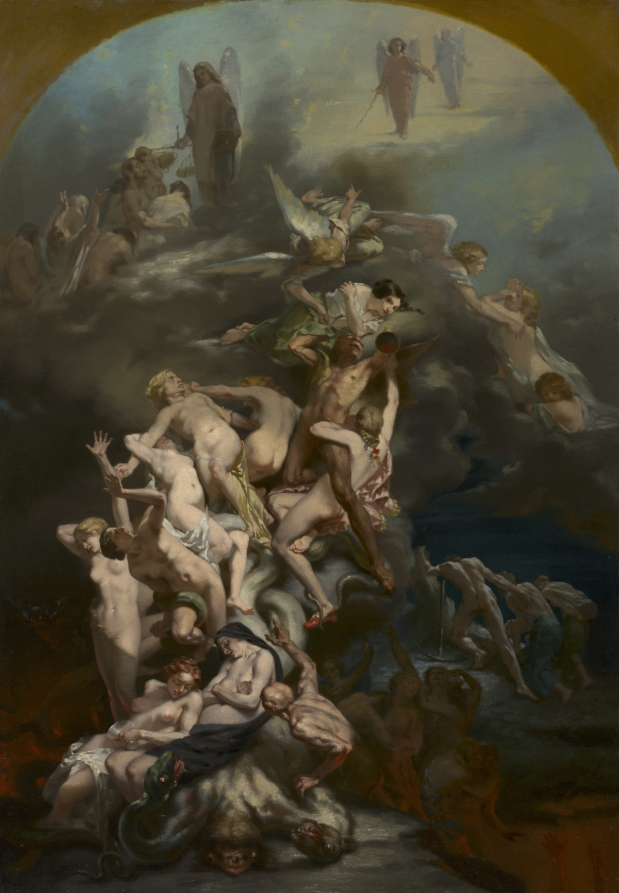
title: Heaven and Hell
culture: France, 19th century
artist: Octave Tassaert (French, 1800–1874)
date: c. 1850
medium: oil on fabric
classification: Painting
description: This painting focuses upon the struggle between good and evil for the soul of a young woman. Looking out at the viewer, she is shown in the upper center of the composition, immediately below an angel and directly above Satan. At the upper right Saint Michael—holding scales for weighing the goodness of souls—admits the blessed to Heaven. Below, the Damned struggle to avoid the fiery pits of Hell and the demons that will torment them for eternity. At the time Tassaert painted this work, France was undergoing considerable political upheaval. In 1848, the country was wracked by a civil war between royalist and republican forces. Tassaert himself believed strongly in the Republic, and probably intended the young woman—caught between the sensual, worldly temptations of royalist excesses and the noble, pure ideals of the Republic—to personify the country of France.